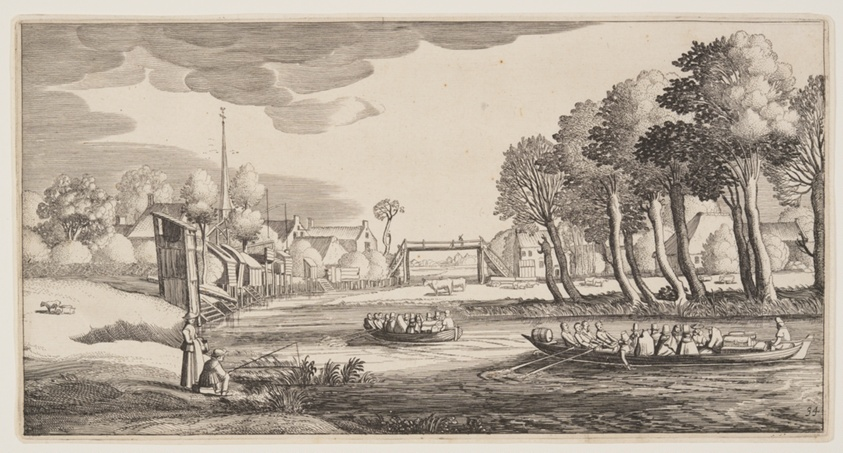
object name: Print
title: Travellers in Row-Boats approaching a Village, from Landscapes (Playsante Lantschappen)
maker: Attributed to Claes Jansz. Visscher II (Dutch, 1586-1652); after Jan van de Velde II (Dutch, c. 1593-1641)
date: c. 1641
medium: Etching, with engraving, on ivory laid paper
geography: Netherlands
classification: etching; paper; print; prints and drawing